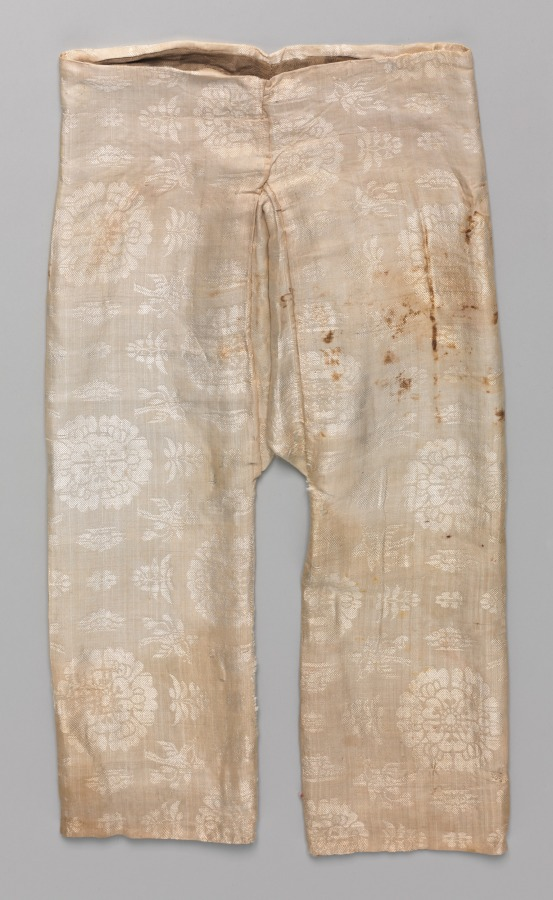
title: Prince's trousers and lining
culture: China, Tang dynasty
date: 700s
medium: twill damask: silk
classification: Garment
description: This coat and pants are part of a set of garments that originally included an outer pair of pants and silk boots made from the same material as the coat. Such rich garments would have been worn by a member of the imperial family or nobility. The fabrics comprising this outfit were woven in widely distant parts of Asia. The silk of the coat, with ducks in pearl roundels, was woven in Sogdiana. The white silk of the pants, ornamented with flowers and birds, is Chinese. Both garments are lined with a Chinese silk woven with a radial floral pattern that was common during the 700s. The coat and pants were made at a time when Tibetan power extended to parts of China, eastern Central Asia, and the trade routes to Sogdiana.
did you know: The pants are made of three parts: two rectangles folded down their length and joined by an inseam, a center front seam, and a back seam; a third piece is a square folded to form a triangle and inserted into the inseam at the crotch